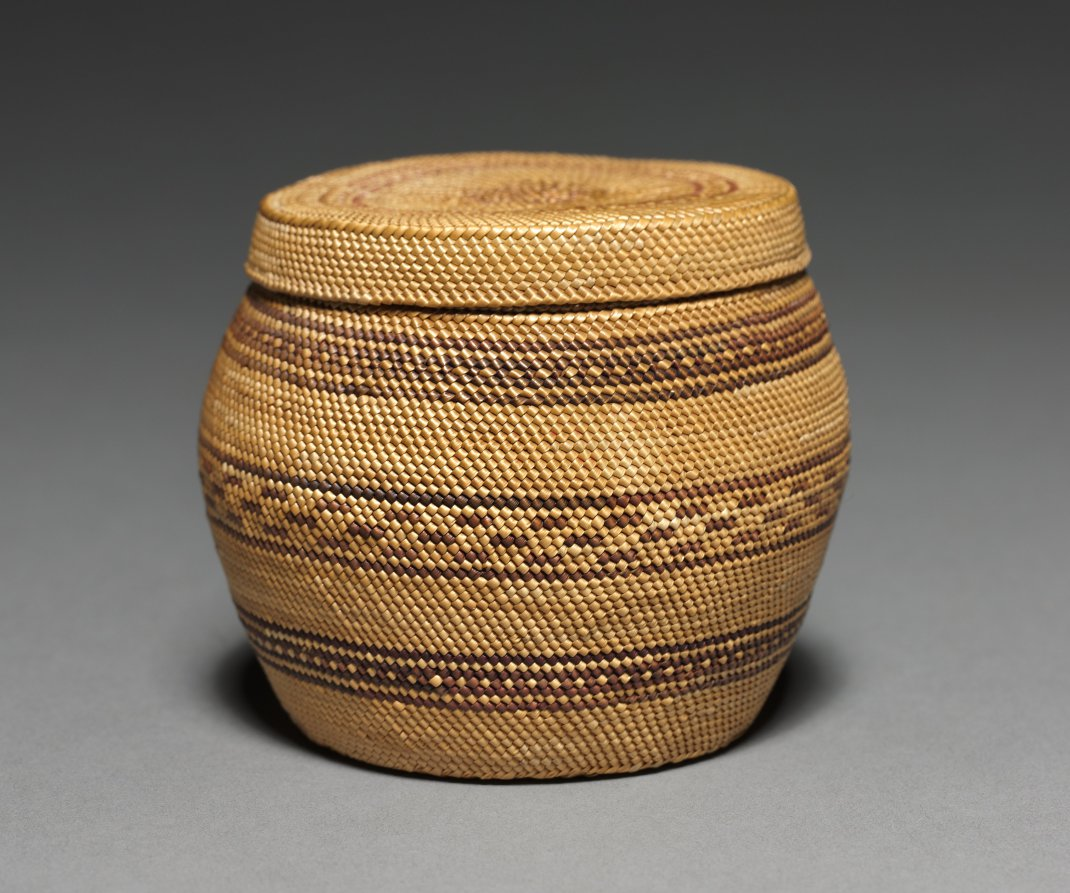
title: Covered Bowl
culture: Northwest Coast, Vancouver Island, late 19th century (?)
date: c. 1875–1900?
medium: twined grass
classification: Basketry